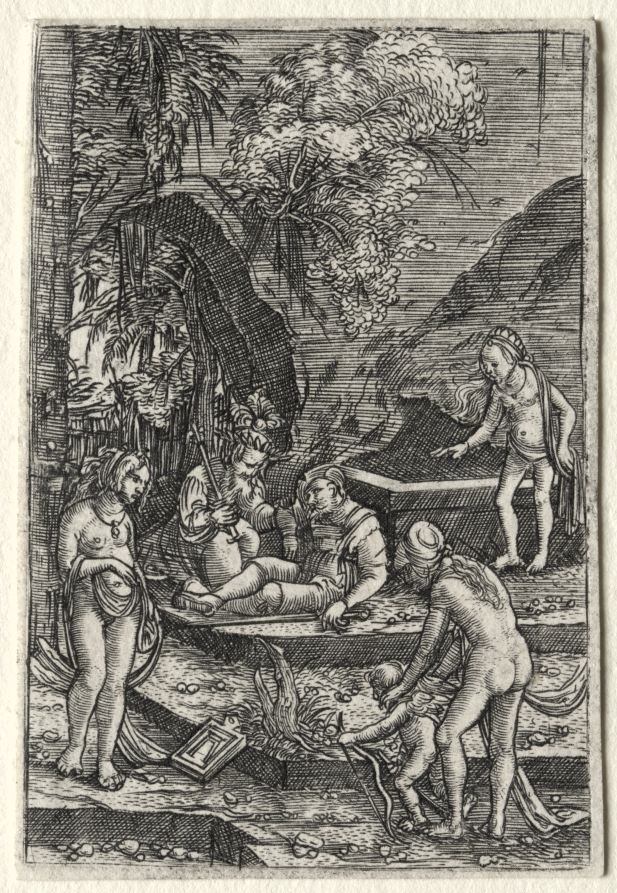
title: The Judgment of Paris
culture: Germany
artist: Albrecht Altdorfer (German, c. 1480–1538)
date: 1511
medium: engraving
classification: Print